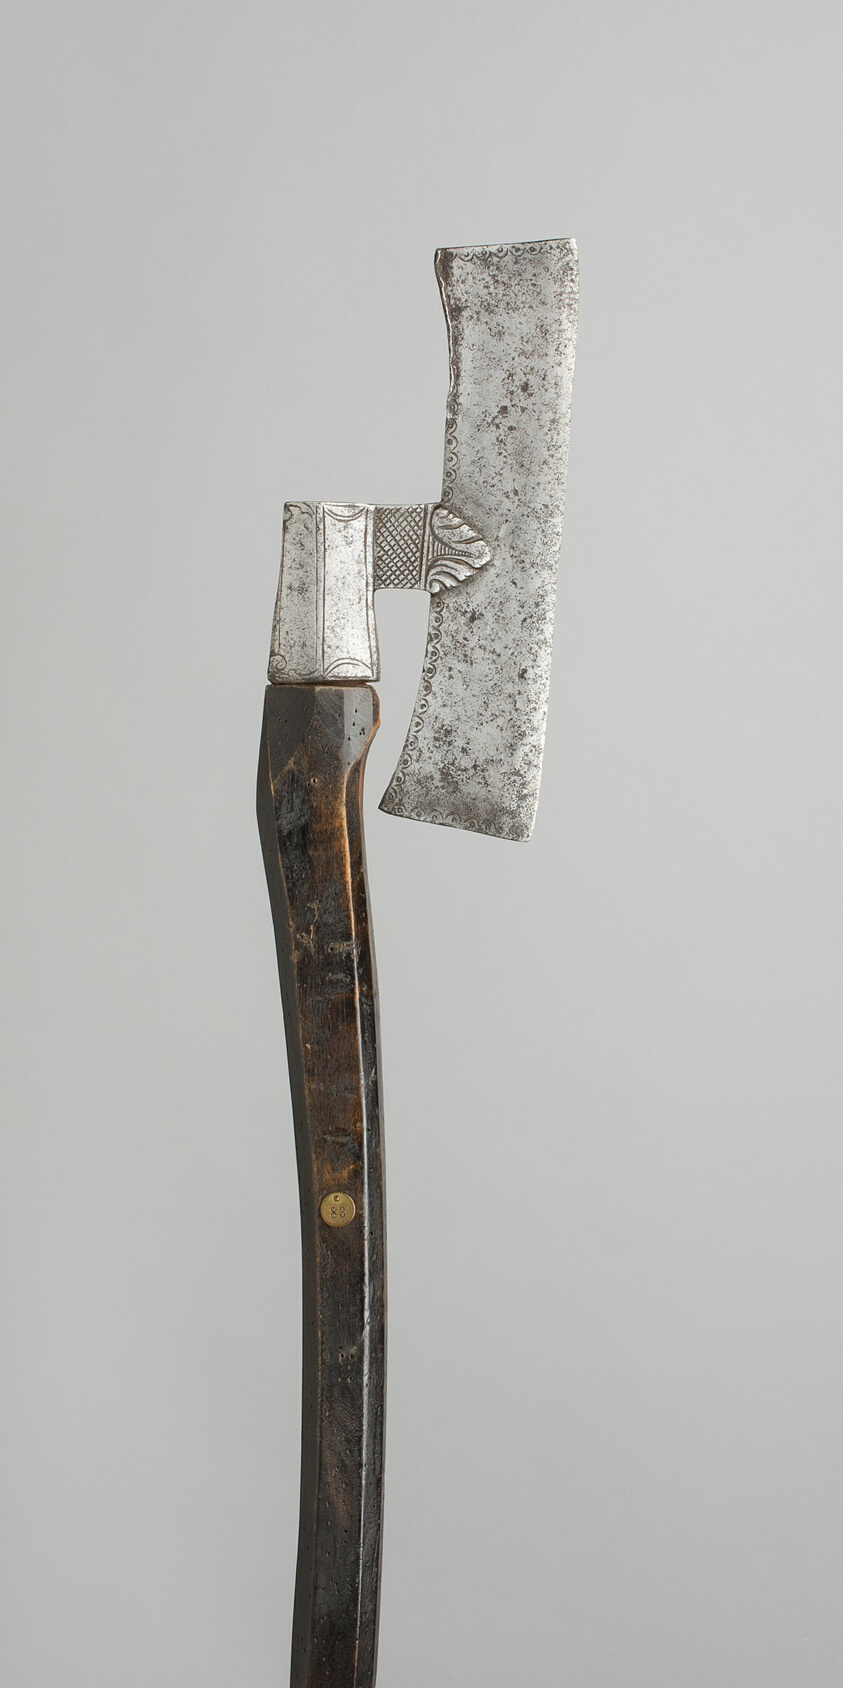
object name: Arms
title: Foot Soldier's Axe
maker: Northern European, possibly Asian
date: 18th/19th century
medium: Steel and wood (ash)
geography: Northern Europe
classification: edged weapon-staff; arms; arms and armor